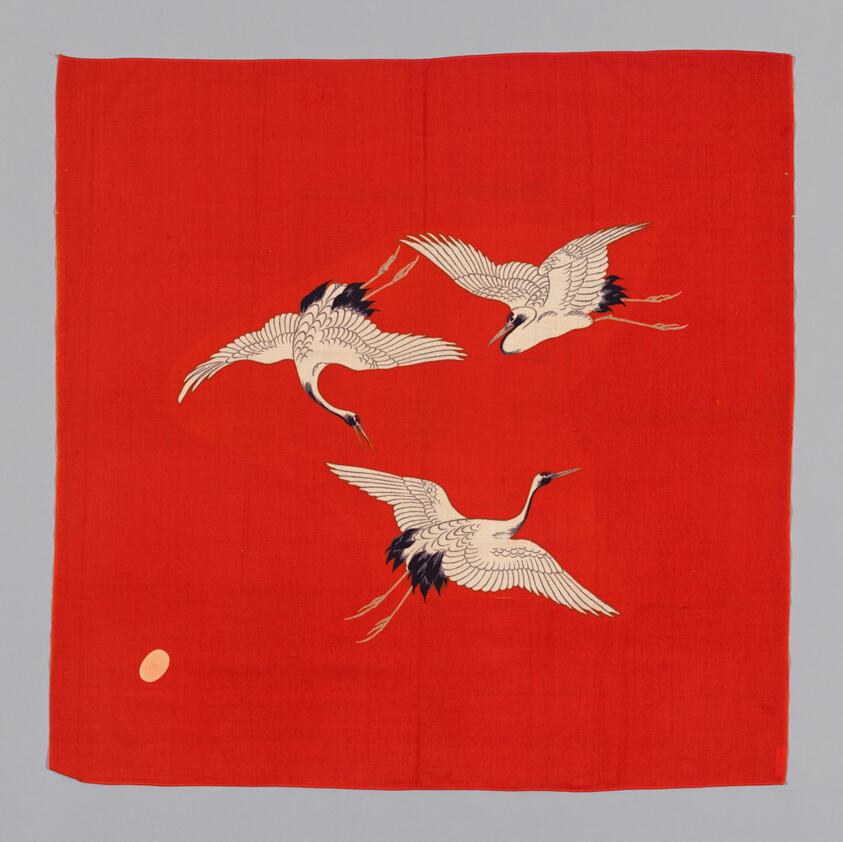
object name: Textile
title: Furoshiki (Wrapping Cloth)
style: meiji, Japanism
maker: Japan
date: Meiji period (1868–1912), late 19th century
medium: Wool, plain weave; resist dyed and stenciled (yûzenzome)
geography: Japan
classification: textile; weaving - printed